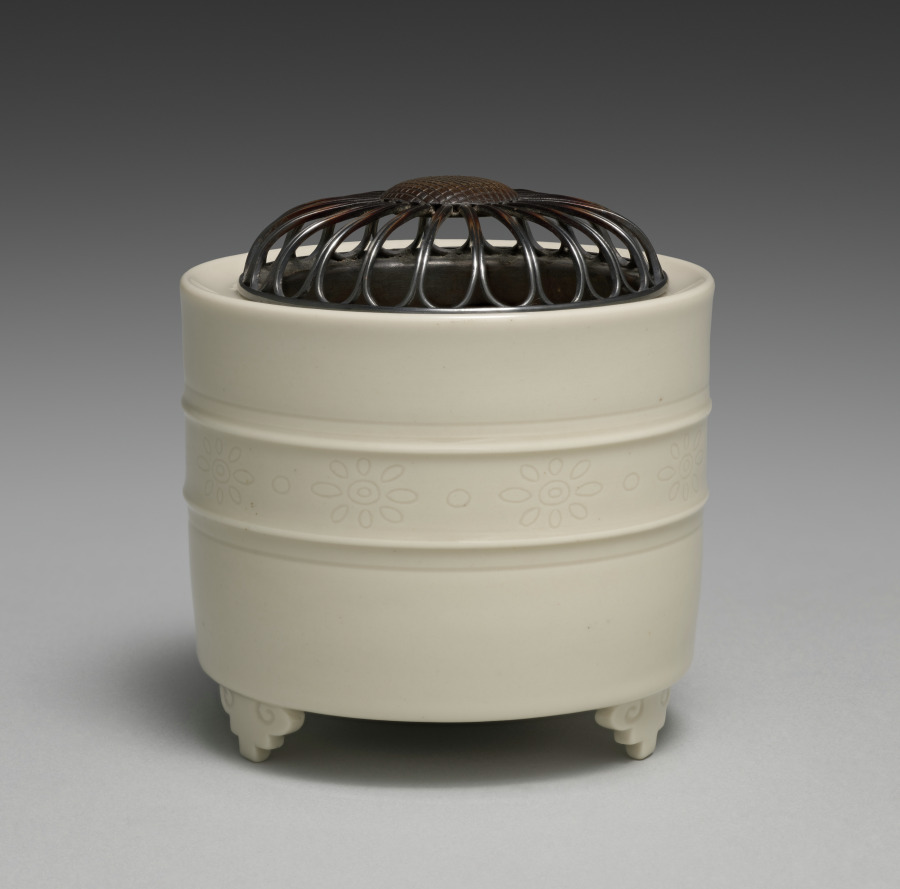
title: Incense Burner with Flowers and Dots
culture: Japan, Meiji period (1868–1912)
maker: Seifū Yohei III (Japanese, 1851–1914)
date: 1893–1914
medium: Porcelain with creamy white translucent glaze and molded and incised design with openwork silver lid in shape of flower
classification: Ceramic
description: Yohei III made incense burners in a wide variety of designs and styles. The body and glaze of this one are taihakuji, or “great white porcelain,” an important early invention Yohei III devised in 1872 that involved the combination of a distinctive translucent, creamy glaze over an ivory-colored clay body. The silver lid is meant to look like a single flower. The vessel has tapering legs with a combined curvilinear and geometric design; the bands encircling the middle have simple, incised flower motifs alternating with single dots.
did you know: This incense burner has floral motifs on both the lid and the burner.